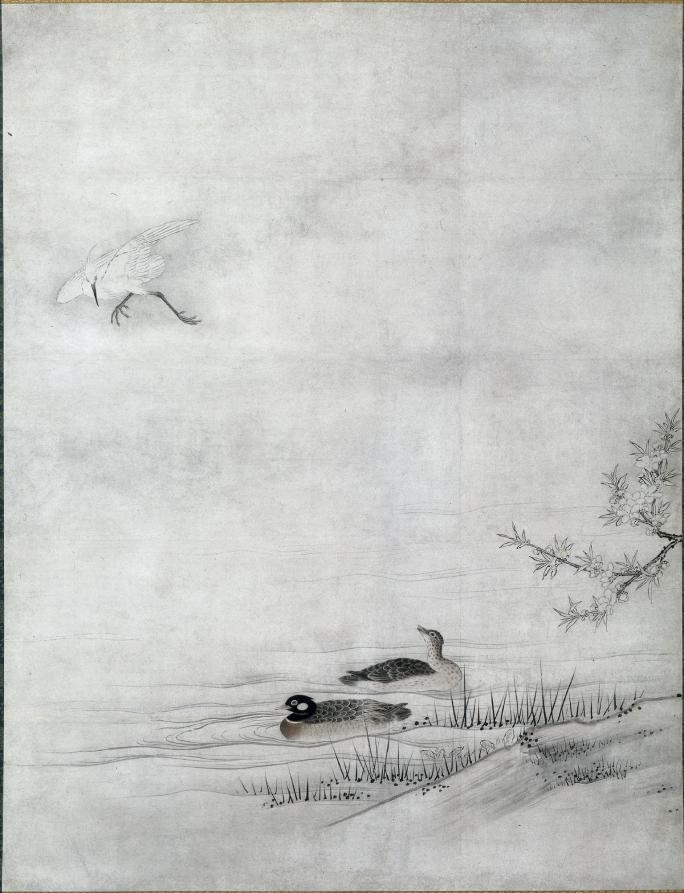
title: Flowers and Birds in a Spring Landscape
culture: Japan, Muromachi period (1392–1573)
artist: attributed to Kano Motonobu (Japanese, c. 1476–1559)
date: 1500s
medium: One of a set of sliding door panels mounted as hanging scrolls; ink and color on paper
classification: Painting